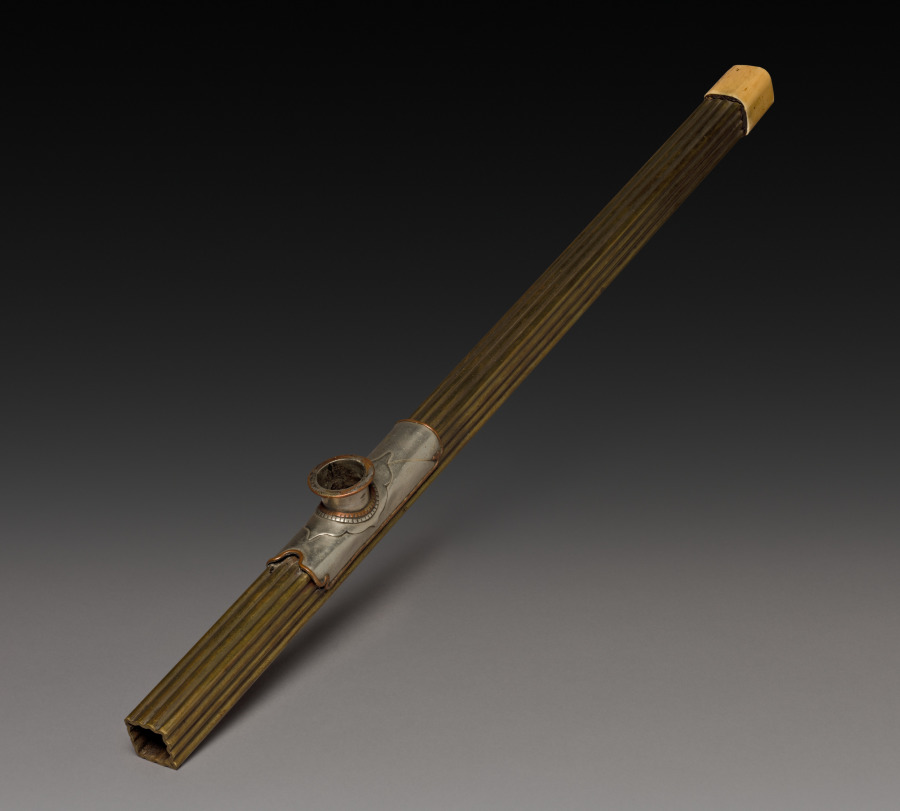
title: Opium Pipe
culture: China, Qing dynasty (1644-1911)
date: 1800s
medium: brass, ivory, pottery and copper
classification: Miscellaneous